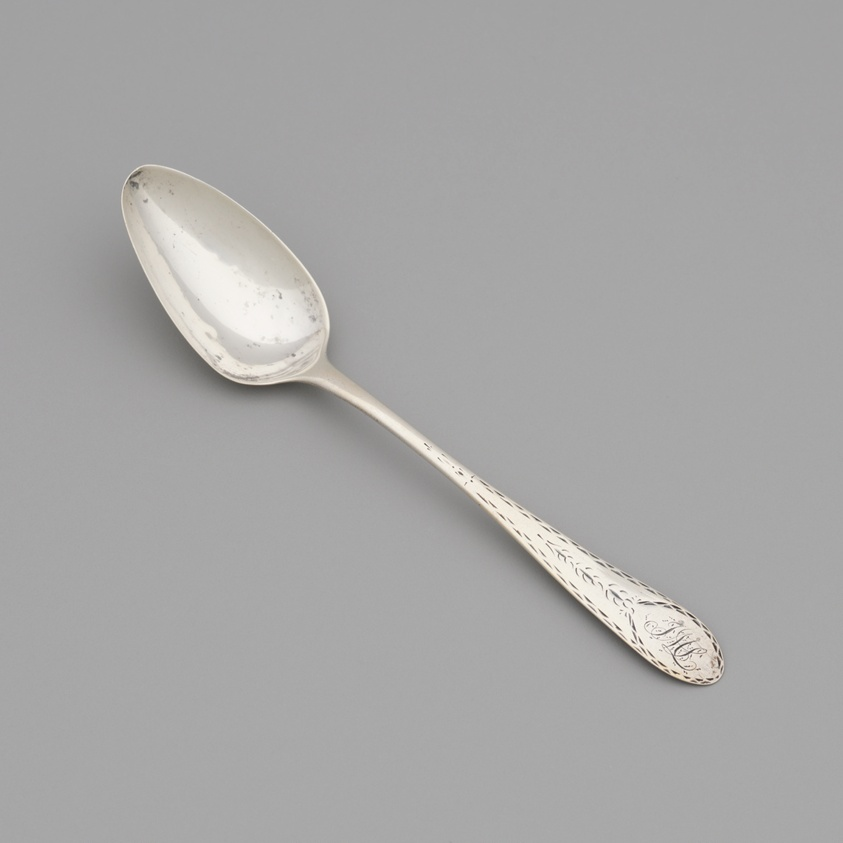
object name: Metalwork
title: Spoon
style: 18th Century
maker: Benjamin Halsted (American, 1734–1817); Probably Philadelphia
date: 1779–85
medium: Silver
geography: Philadelphia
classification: decorative arts; spoon